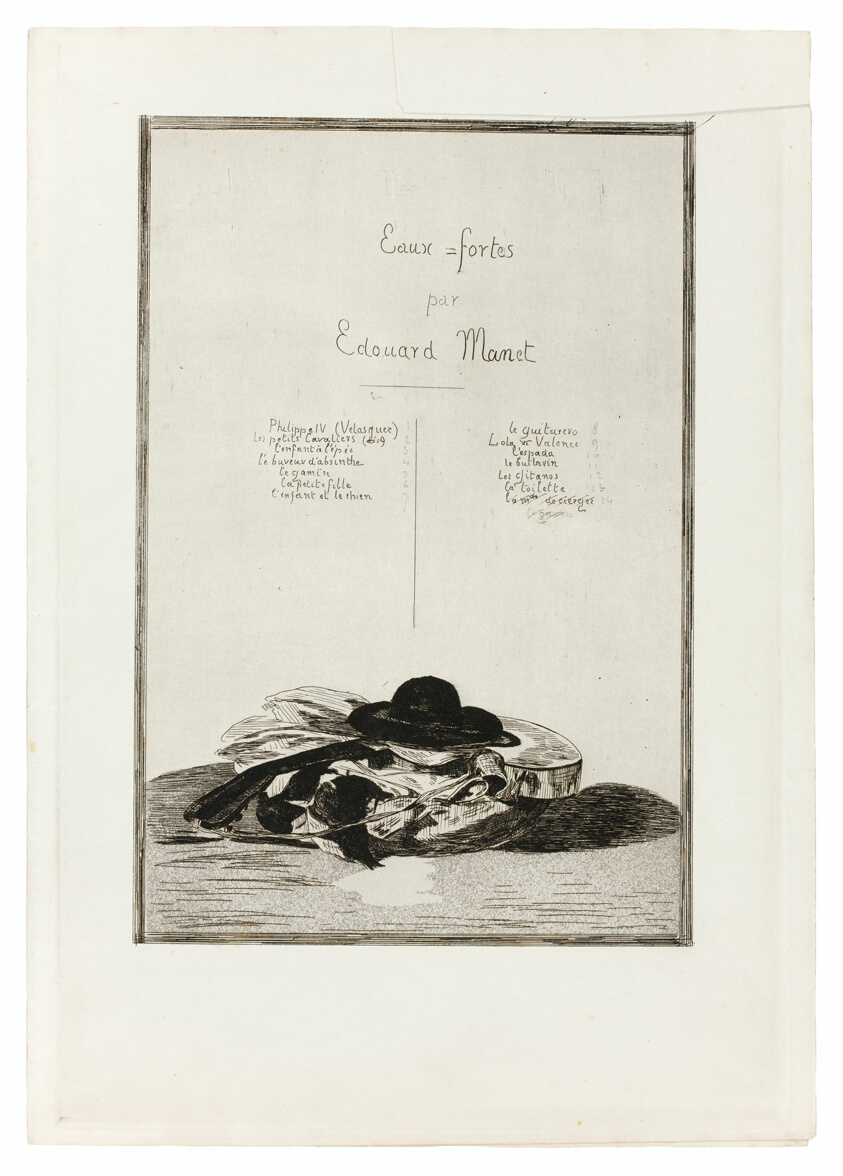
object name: Print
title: Hat and Guitar, Frontispiece for the edition of fourteen etchings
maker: Édouard Manet (French, 1832-1883)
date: 1862–63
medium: Etching, aquatint and drypoint in black on ivory wove paper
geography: France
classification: etching; print; prints and drawing